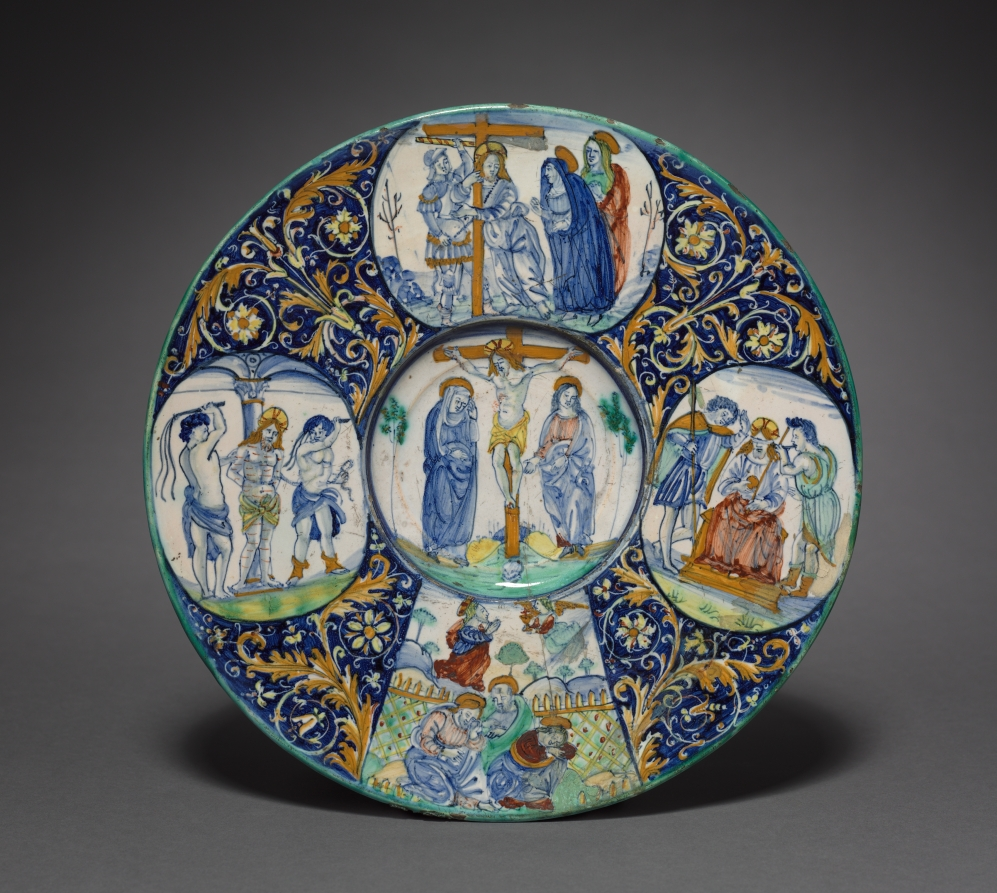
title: Plate Depicting Christ’s Passion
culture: Italy, Florentine region, Cafaggiolo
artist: attributed to Painter of the Royal Procession (Italian)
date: c. 1510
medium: tin-glazed earthenware (maiolica)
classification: Ceramic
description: The painted scenes on this plate depicting the Passion of Christ include the betrayal of Jesus by his disciple Judas (right); the arrest and condemnation by the Jews (left); the bearing of the cross (top); the Crucifixion (middle); and the resurrection (bottom). At least one of the scenes (the condemnation or the Scourging at the Pillar) is based on a Florentine woodcut from the devotional writings of Girolamo Savonarola (1452–1498).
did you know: During the Renaissance, scenes from the Christian Bible were prominently featured on maiolica, covering the surface in a style called istoriato (decorated with stories).